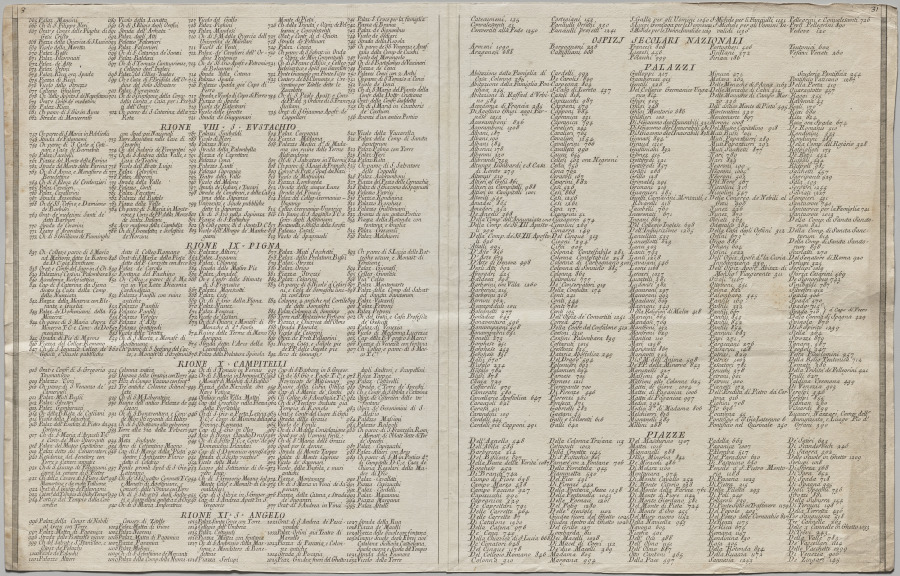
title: Nuova pianta di Roma data in luce da Giambattista Nolli l’anno MDCCXLVII, known as La Pianta Grande di Roma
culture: Italy, 18th century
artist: Giovanni Battista Nolli (Italian, 1701–1756)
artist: Carlo Nolli (Italian, 1690–1790)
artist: Rocco Pozzi (Italian, 1701–1774)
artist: Pietro Campana de Soriano (Italian, 1725–c. 1779)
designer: Stefano Pozzi (Italian, 1699–1768)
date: 1748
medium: etching and engraving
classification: Print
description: The monumental Pianta Grande di Roma, or Large Plan of Rome, which measures about 5 x 7 feet when its twelve plates are assembled, is a landmark in both cartography and printmaking. The map is considered the first scientific rendering of Rome, establishing new standards of accuracy and thoroughness when it was published in 1748. Devised by the Lombard architect and surveyor Giovanni Battista Nolli (Italian, 1701-56), the creation of the map required over ten years of surveying the city carried out by Nolli and a team of assistants with the help of new measuring devices. In Nolli’s “ichnographic” (also called “ground”) plan, architectural features and the urban infrastructure are reduced to a single horizontal slice, a minutely detailed footprint that conveys dimensions, proportions, and orientations to scale with the utmost clarity.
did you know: To make this map, Pope Clement XII granted the mapmaker permission to measure courtyards and other interior, inaccessible spaces in monastic communities, even those in nuns’ convents, which was controversial at the time.